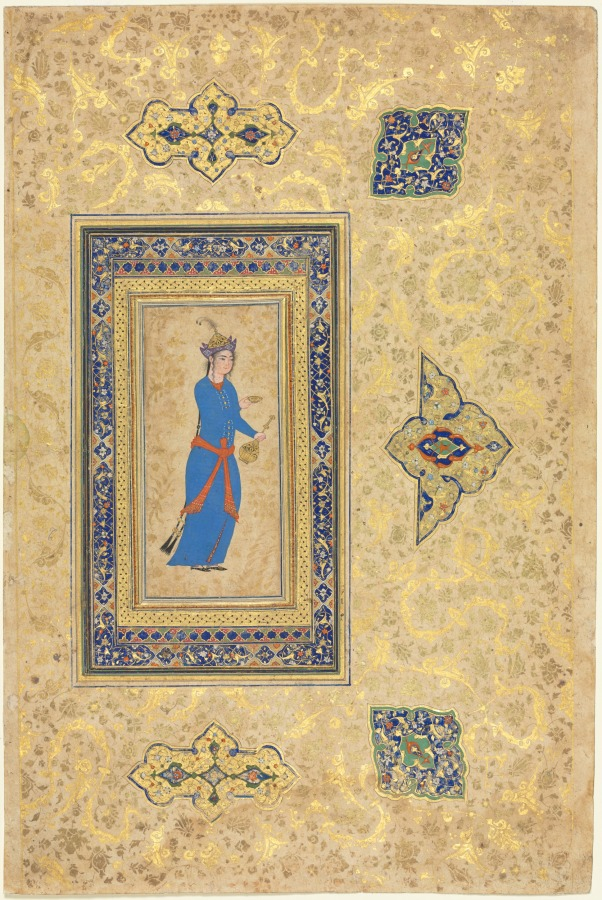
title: Princess with Wine Bottle and Cup (recto); Persian Verses (verso)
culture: Iran, Qazvin or Isfahan, Safavid period (1501-1722) (recto); Iran, possibly Timurid period (1370-1501) (verso)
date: c. 1550–1600 (recto); c. 1450–1500 (verso)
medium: opaque watercolor, ink, and gold on paper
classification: Manuscript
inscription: verso script: Nasta'liq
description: Single-page depictions of courtly figures became popular in Iran during the 1500s. The subject here conveys Safavid ideals of female beauty. Long dark hair falls in jeweled braids down to her ankles, while shorter tendrils frame her full, smooth face. She is shown in the three-quarter profile favored in Persian painting. The contrasting colors of the bright blue of her robe and the orange of her sash and tunic beneath are features of Safavid fashion.